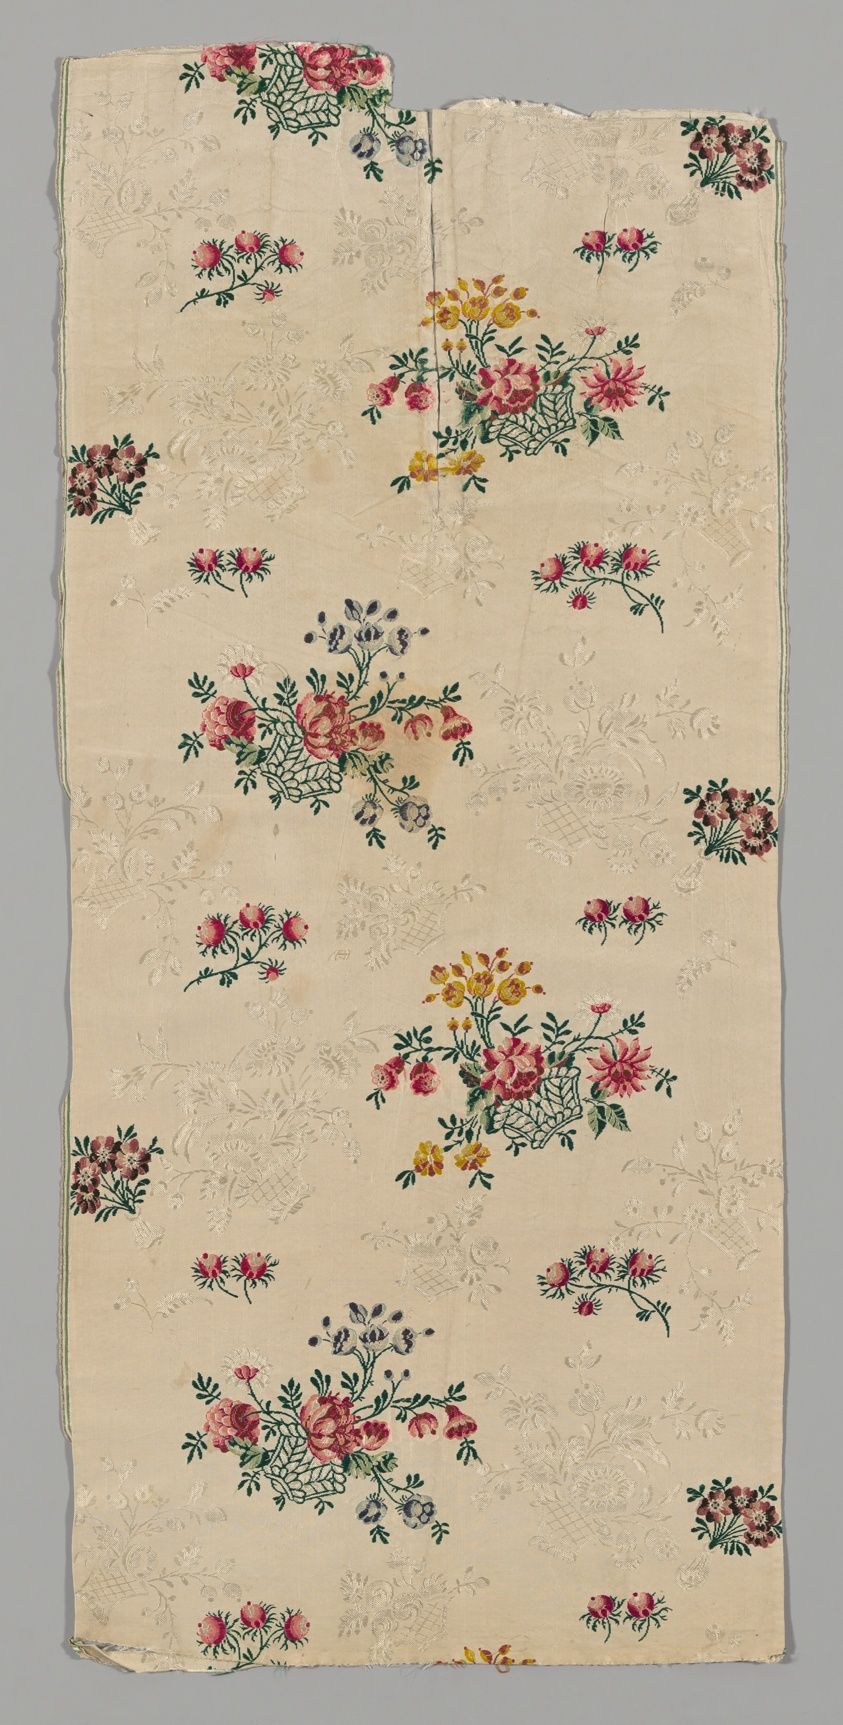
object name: Textile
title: Panel (From a Dress)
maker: England, Spitalfields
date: c. 1745/46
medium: Silk, plain weave with supplementary patterning wefts and supplementary brocading wefts; both selvages present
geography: England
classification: textile; weaving